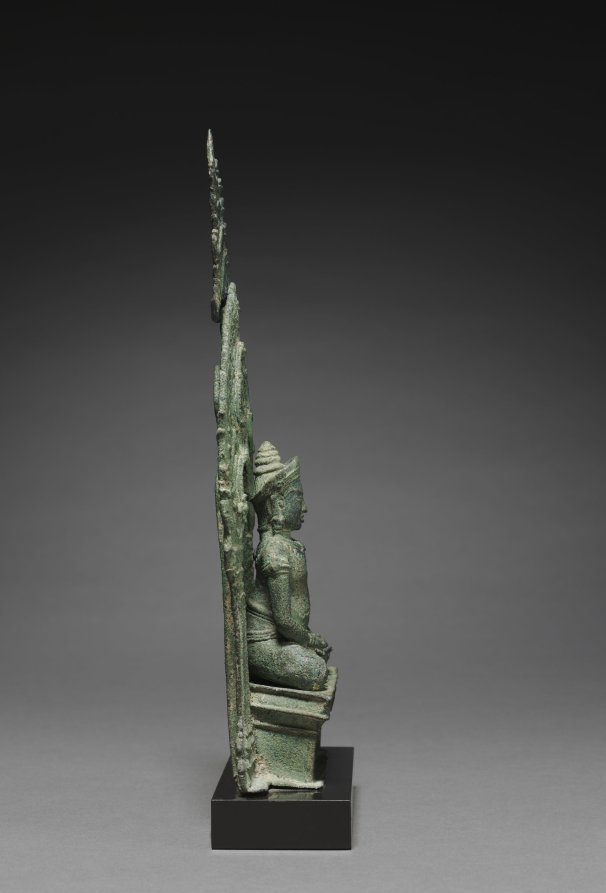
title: Altarpiece with Buddha Enthroned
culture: Cambodia, found in Vietnam, near Ho Chi Minh City, Reign of Suryavarman II, Angkor Wat Period, 1st half 12th Century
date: mid-1100s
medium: bronze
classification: Sculpture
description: The crown and jewels of this Buddha indicate that he is a transcendent Buddha, not the historical Buddha who lived in the 5th century BCE. Small-scale bronze images of transcendent Buddhas were used in tantric practices as personal meditation images or in ritual settings. Tantric Buddhism was adopted as the state religion during the 12th century in the region of Angkor. A depiction of the tree that references the moment of the Buddha’s enlightenment is above the scalloped serpentine form of the niche under which he sits enthroned on an altar. An object interpreted as a lotus bud rests on the hands in his lap as he sits in a posture of meditation.